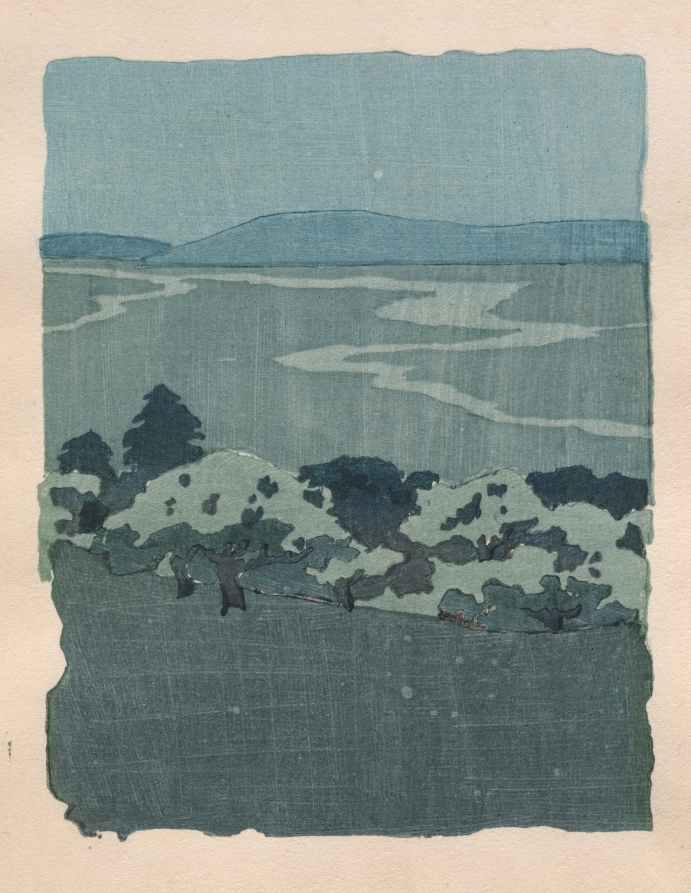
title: Dragon and Orchard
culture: America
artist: Arthur Wesley Dow (American, 1857–1922)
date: c. 1908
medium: color woodcut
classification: Print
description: In his dual roles as artist and teacher, Dow was instrumental in reviving the color woodcut in America at the turn of the 20th century. Impressed by the flat, simplified compositions of Japanese color woodcuts, or ukiyo-e prints, Dow abandoned Western naturalism, with its linear modeling and one-point perspective, in favor of the basic elements of Japanese design: line, form, color, and notan—the harmonious arrangement of dark and light. Although in Japan the artist only executed the drawing—the carving and printing were carried out by craftsmen—Dow did everything himself. Like the Japanese, however, he printed by hand on mulberry paper. The picturesque Massachusetts fishing village of Ipswich and the surrounding area were Dow's subjects. The town is separated from the sea by sprawling salt marshes that are divided by canals and rivers. Dow expressed the changing effects of atmosphere and light by experimenting with color, which resulted in unique impressions.